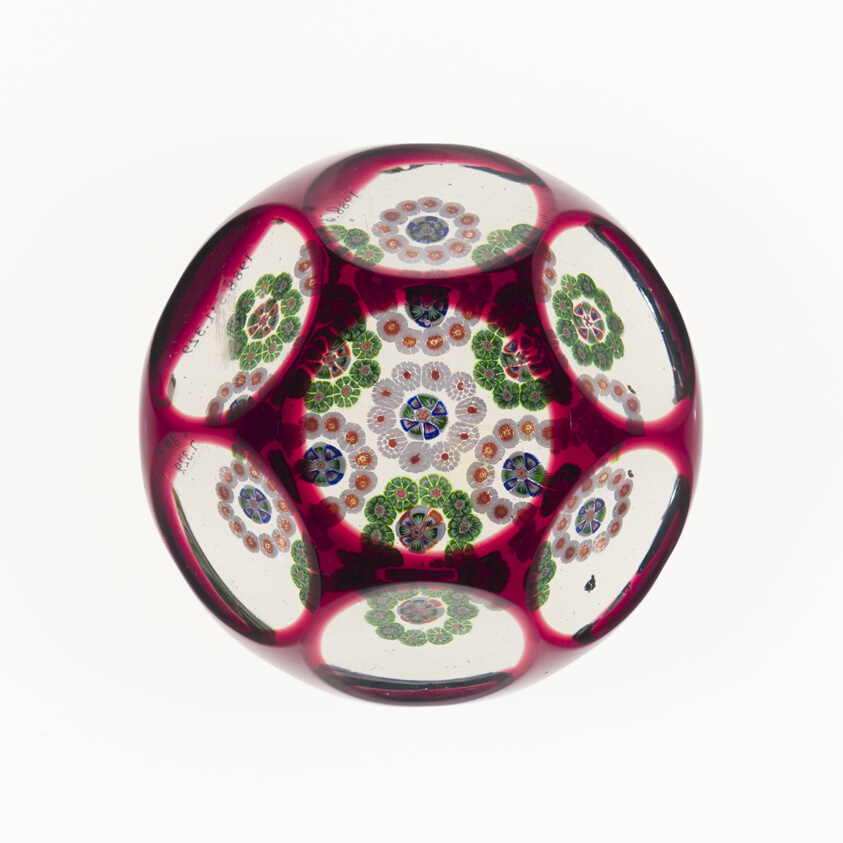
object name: Glass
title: Paperweight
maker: Baccarat Glassworks (Cristalleries de Baccarat); Lorraine, France, founded 1764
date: 19th century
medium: Glass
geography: France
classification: paperweight; glass